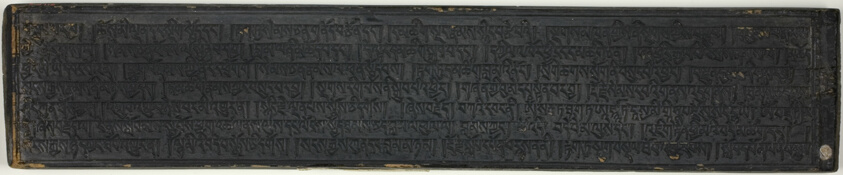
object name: Religious/Ritual Object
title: Prayer Board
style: Himalayan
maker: Tibet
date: 15th/17th century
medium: Wood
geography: Tibet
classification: wood; manuscript; asian art; ritual objects